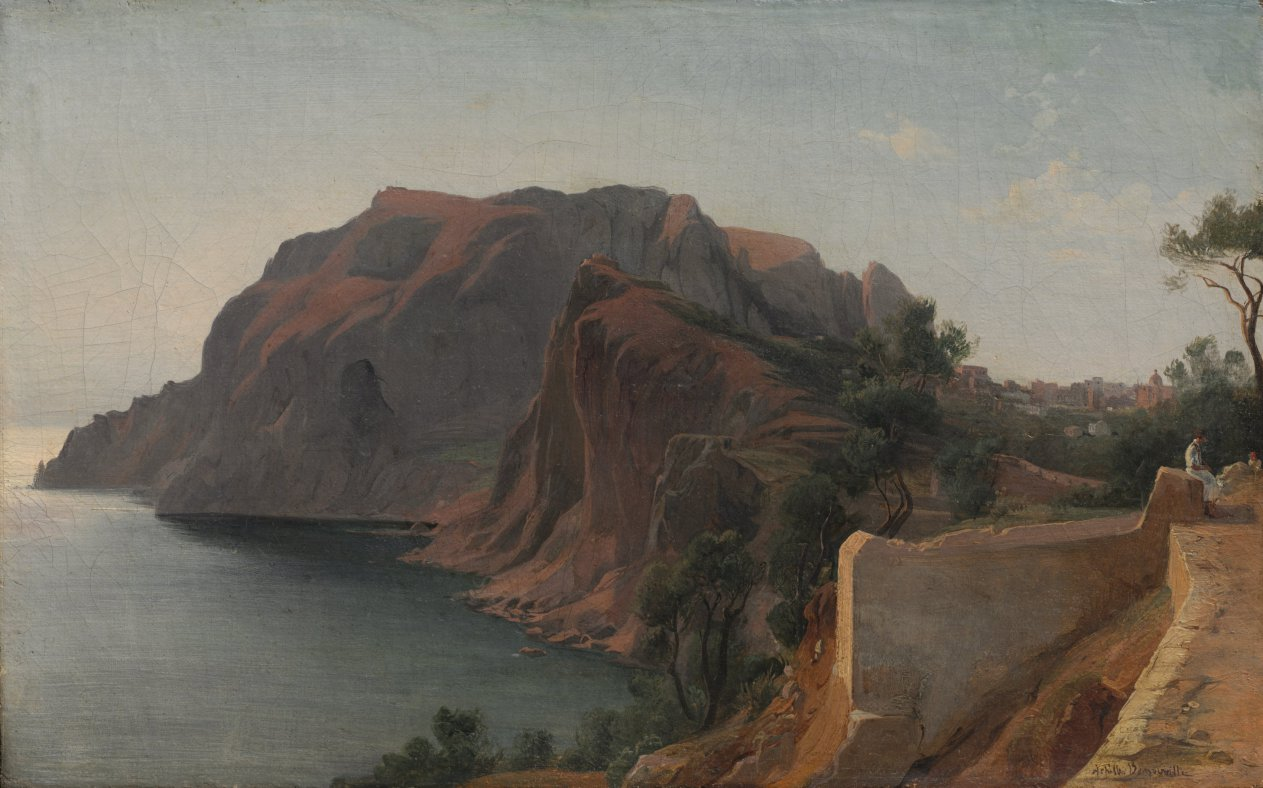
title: Capri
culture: France, 19th century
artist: Jean Achille Benouville (French, 1815–1891)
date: c. 1845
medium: oil on fabric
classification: Painting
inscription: Signed lower right: Achille Benouville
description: Located in the Mediterrean Sea, south of Rome, the island of Capri has been famous since Roman times for its spectacular scenery and mild climate. In the 19th century it became the home of many European nobles, and attracted artists from across the continent. Here Benouville captured the beauty of the island's rocky coastline, focusing his attention on a path leading toward the city of Capri and past the rocky outcropping of Monte Solaro. Fascinated by the Italian landscape, Benouville spent years in Italy drawing and painting the countryside. From 1838 to 1845 he made at least three trips there, and in 1845, after winning the Prix de Rome—a fellowship allowing promising artists to study in that city—he spent much of the next 25 years in Italy. Although trained to paint landscapes in a very formal manner, after leaving France Benouville began to paint his subjects with a much more personal, nontraditional approach. This may account for this picture's unusual composition, in which much of the canvas is given to indistinct but beautifully painted stone, sky, and water.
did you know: A pair of figures rest on the right side of the composition—both in white garments, taking in the refreshing scent of the sea air.